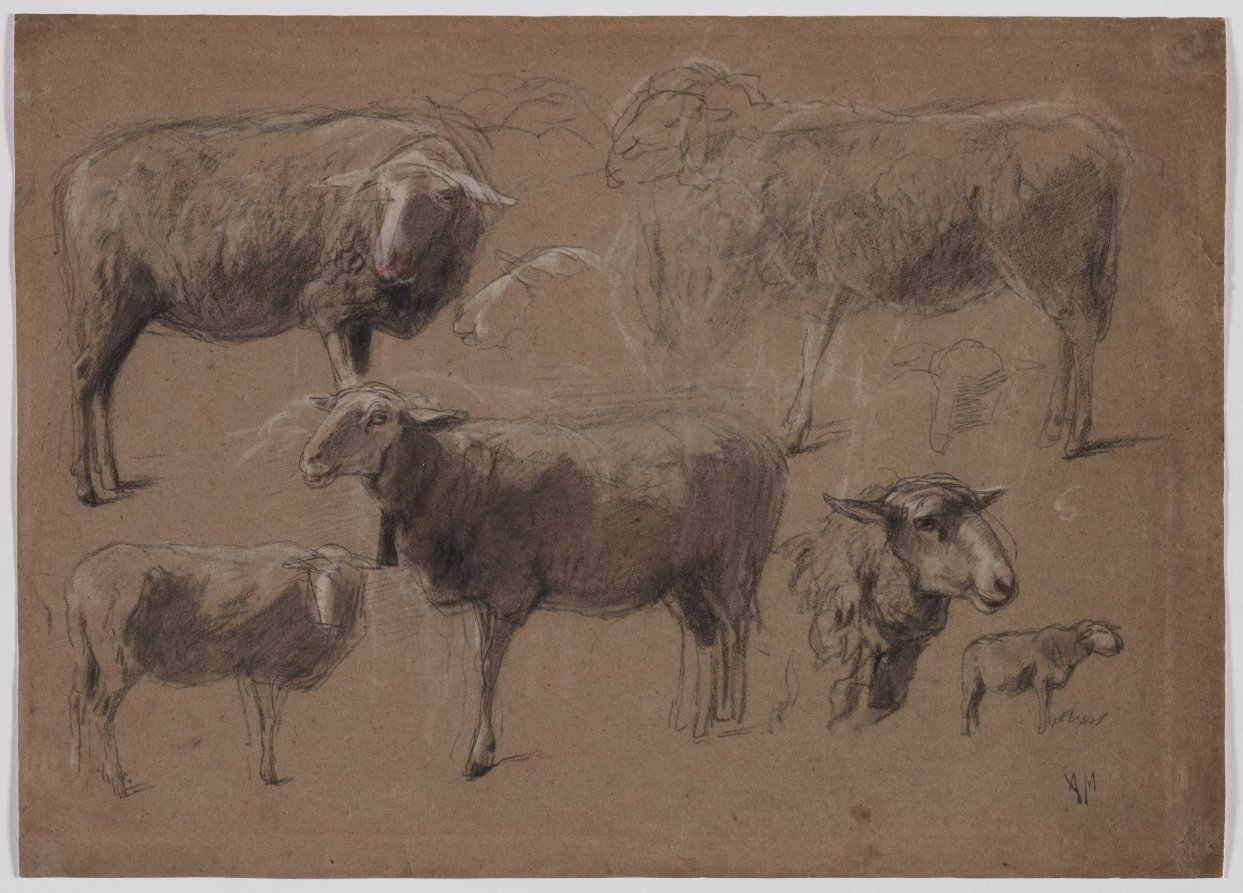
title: Studies of Sheep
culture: Netherlands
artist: Anton Mauve (Dutch, 1838–1888)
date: c. 1850–88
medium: black and white chalk, with red chalk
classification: Drawing